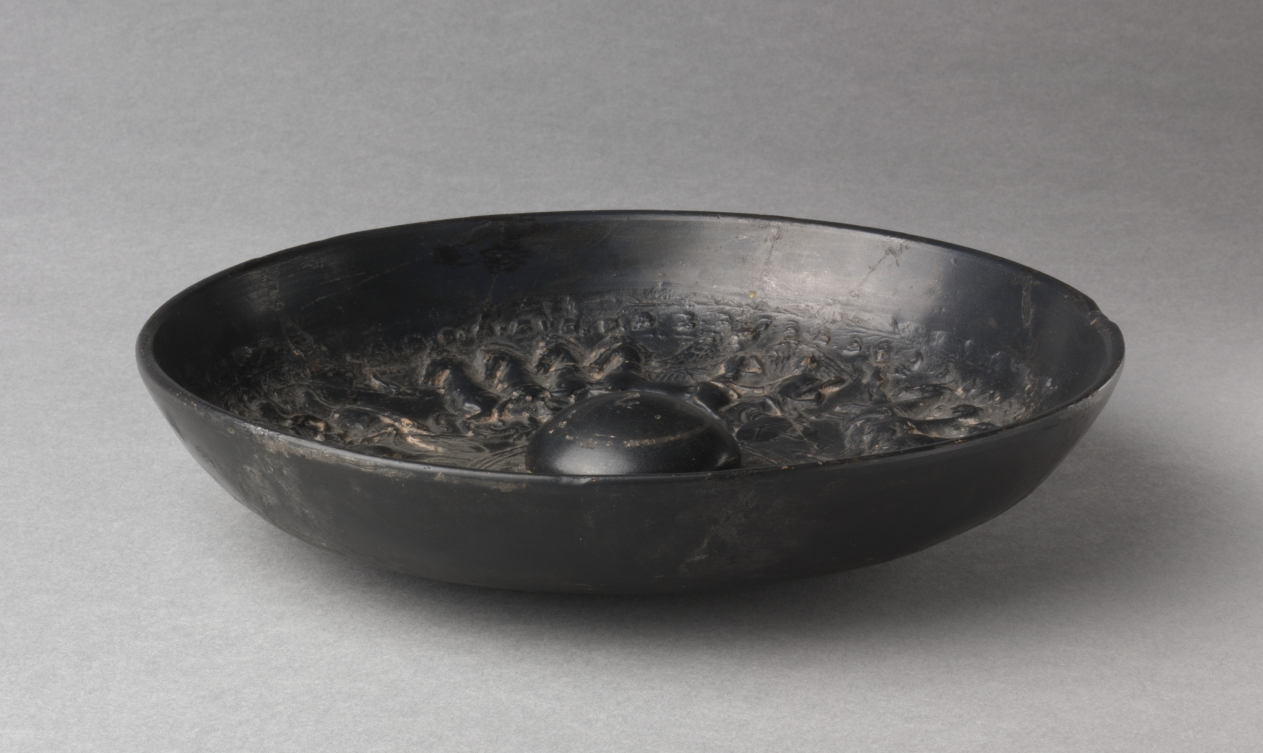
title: Black-Gloss Mesomphalic Phiale (Libation Bowl): Apotheosis of Herakles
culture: South Italian, Campanian (Calenian)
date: 200s BCE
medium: ceramic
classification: Ceramic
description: Four four-horse chariots proceed around the interior of this libation bowl, each driven by a winged Nike (Victory) and accompanied by a flying Eros. Each carries a different figure—Athena, Herakles, Ares, and Dionysos—and small animals race along before the horses. The appearance of Herakles with these Olympians suggests his apotheosis.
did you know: This type of glossy ceramic vessel likely imitates costlier objects made of precious metal.